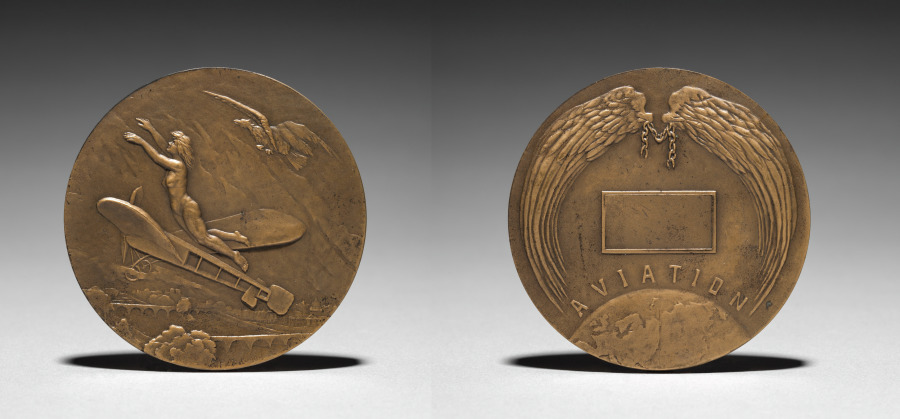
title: Medal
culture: France, 19th century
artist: F. Montagny (French)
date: c.1920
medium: bronze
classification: Metalwork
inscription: inscribed: F. Montagny.